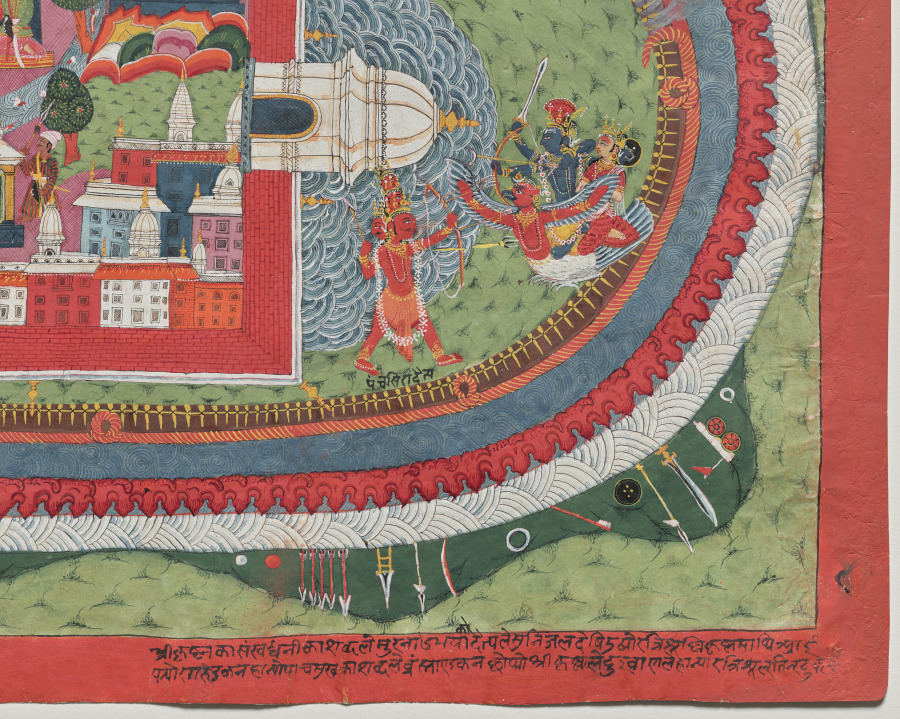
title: Krishna and Satyabhama Storm the Citadel of Naraka, folio 97 from a Bhagavata Purana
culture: Nepal, Kathmandu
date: c. 1775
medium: Gum tempera and ink on paper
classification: Painting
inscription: [[Lower right corner, bottom margin, descriptive caption in a Nepali vernacular, written in Devanagari script]]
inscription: [[Folio number in the upper left corner]] 97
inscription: [[Folio number in lower right margin]] 9[7]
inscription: [[Label inscription below the red demon in the lower right, in a Nepali vernacular, written in Devanagari script]] paṁcasirādaisa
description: From a series depicting the life of Krishna, an incarnation of the Hindu god Vishnu, this scene takes place at the demon king Naraka’s citadel. Seen from above, the mountaintop fortress is surrounded by concentric fortifications that recall the format of a mandala. In the upper left chambers, Naraka sits with nymphs he abducted from heaven. At the right, coming to rescue them, the blue Krishna with his wife blasts through the fortifications on his man-eagle mount Garuda. He prepares to shoot a crescent-shaped arrowhead that has the magical power of a mantra capable of destroying the multiheaded red demon guard.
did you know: Krishna’s arrowheads are crescent-shaped, meaning that they have the destructive power of special mantras.